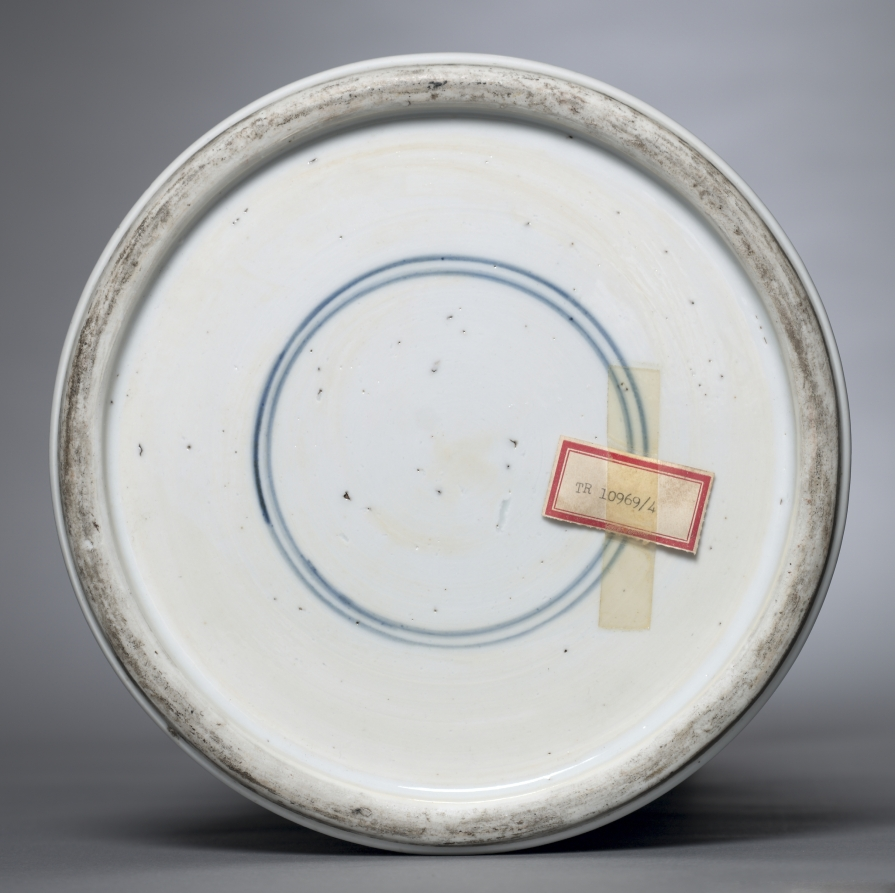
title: Vase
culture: China, Jiangxi province, Jingdezhen kilns, Qing dynasty (1644–1911), Kangxi reign (1662–1722)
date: 1662–1722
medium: porcelain with underglaze blue decoration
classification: Ceramic